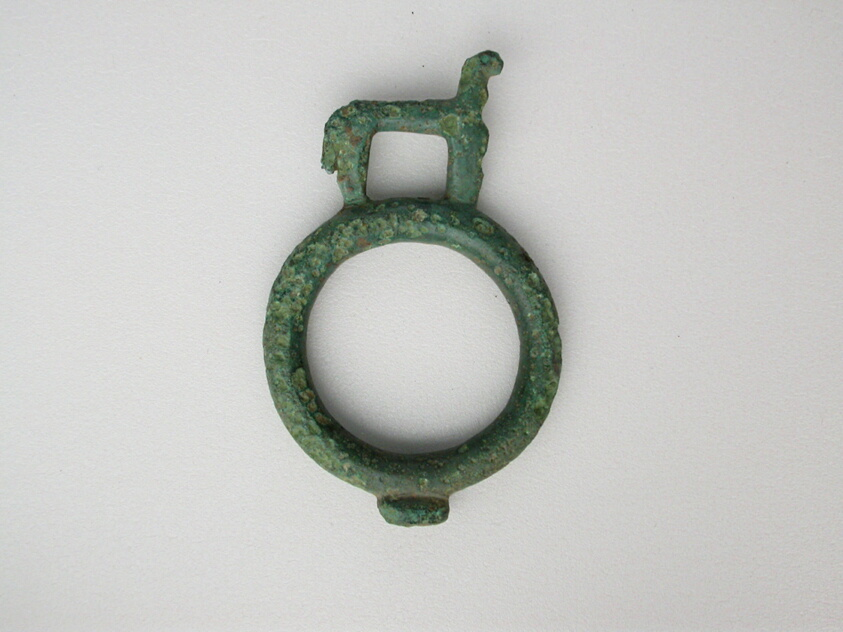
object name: Decorative Arts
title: Harness Ring with Quadruped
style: geometric, ancient, greek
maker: Greek; Thessaly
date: Geometric Period (800–600 BCE)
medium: Bronze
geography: Thessalía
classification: votive offering; ex-voto; decorative arts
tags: animals